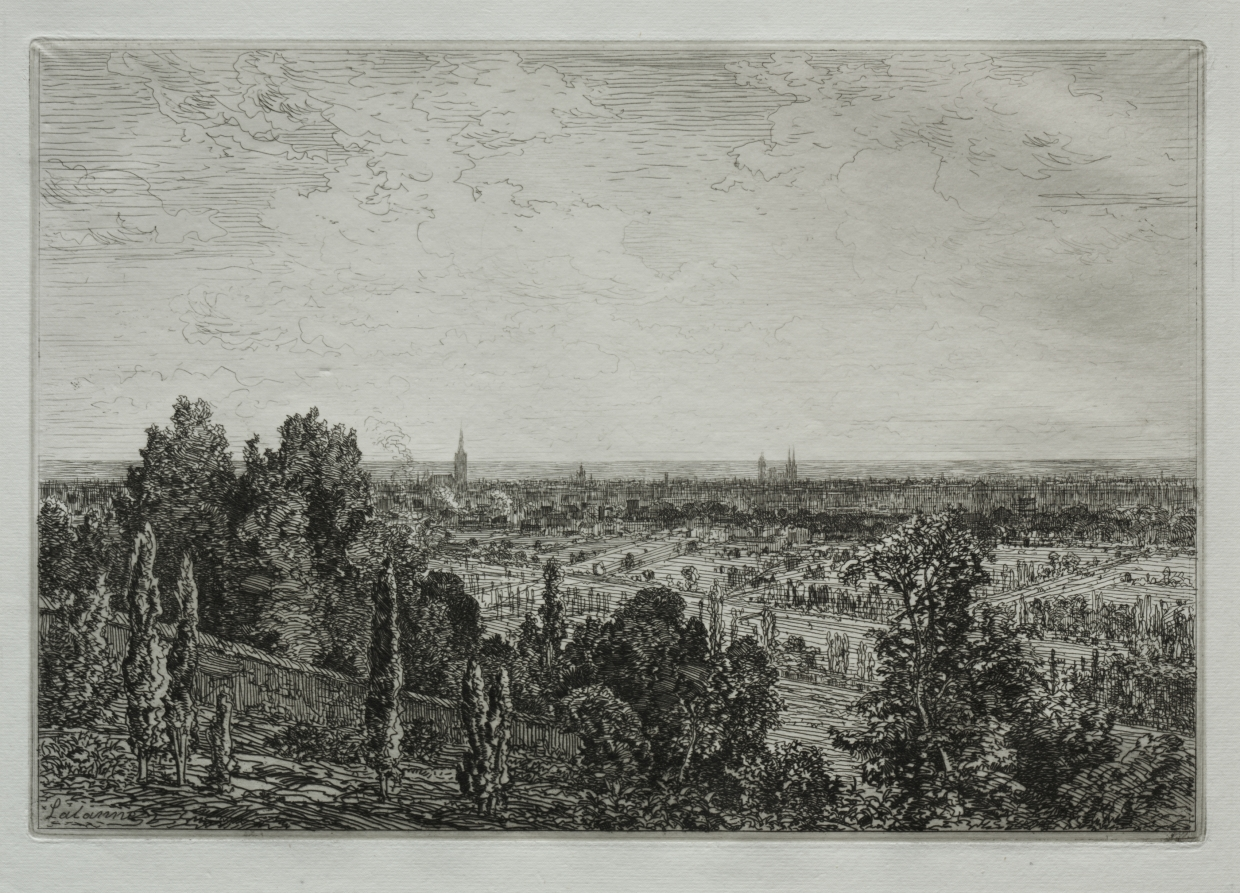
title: Bordeaux, View from the Coast of Cénon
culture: France, 19th century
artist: Maxime Lalanne (French, 1827–1886)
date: 1879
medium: etching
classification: Print